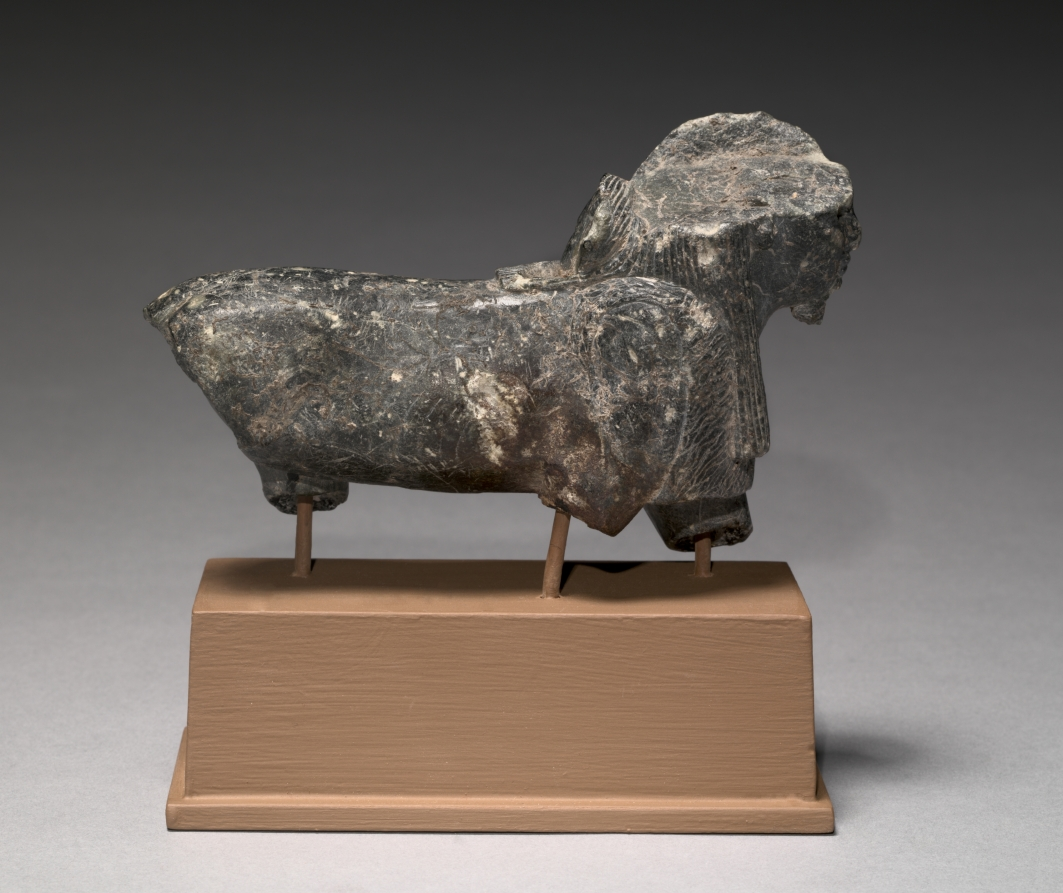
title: Tutu as Sphinx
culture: Egypt, Greco-Roman period (332 BCE–395 CE), Ptolemaic dynasty (305–30 BCE)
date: 150 BCE–30 CE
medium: gray steatite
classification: Sculpture